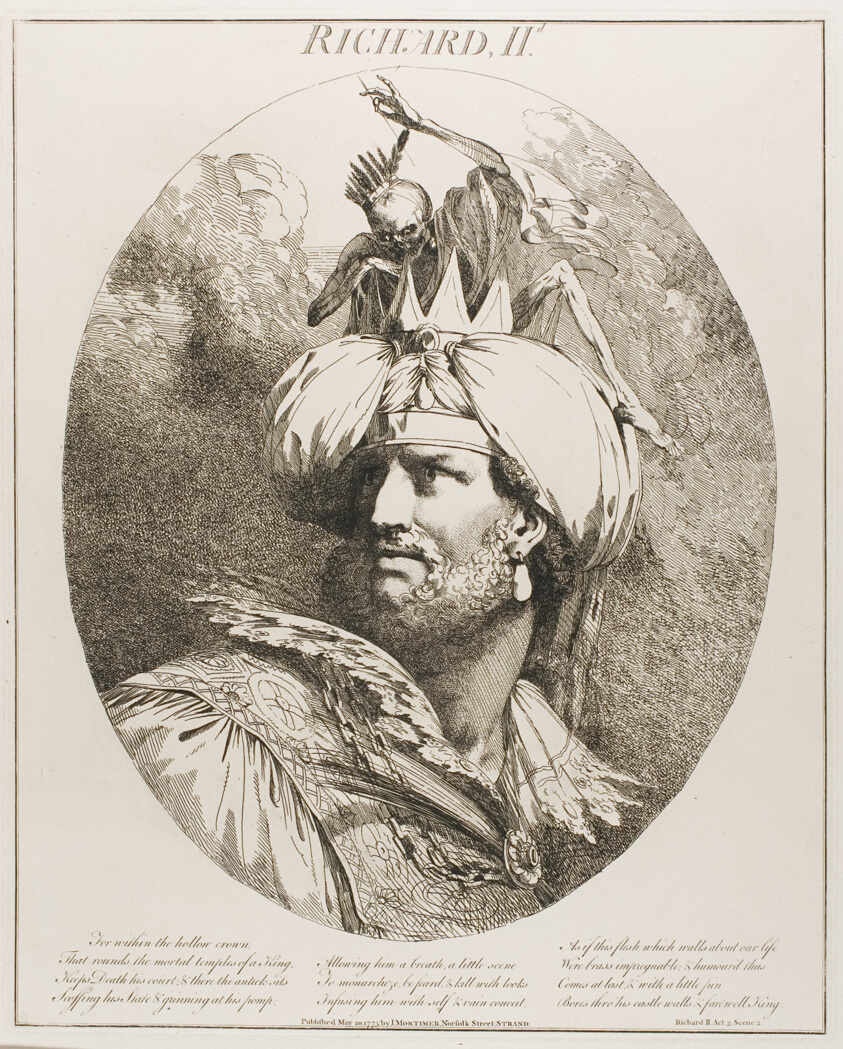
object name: Print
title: Richard II, from Twelve Characters from Shakespeare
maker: John Hamilton Mortimer (English, 1740-1779)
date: May 20, 1775 (originally published), published 1809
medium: Etching on cream wove paper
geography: England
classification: etching; print; prints and drawing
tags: Richard II, literature, prints and drawings